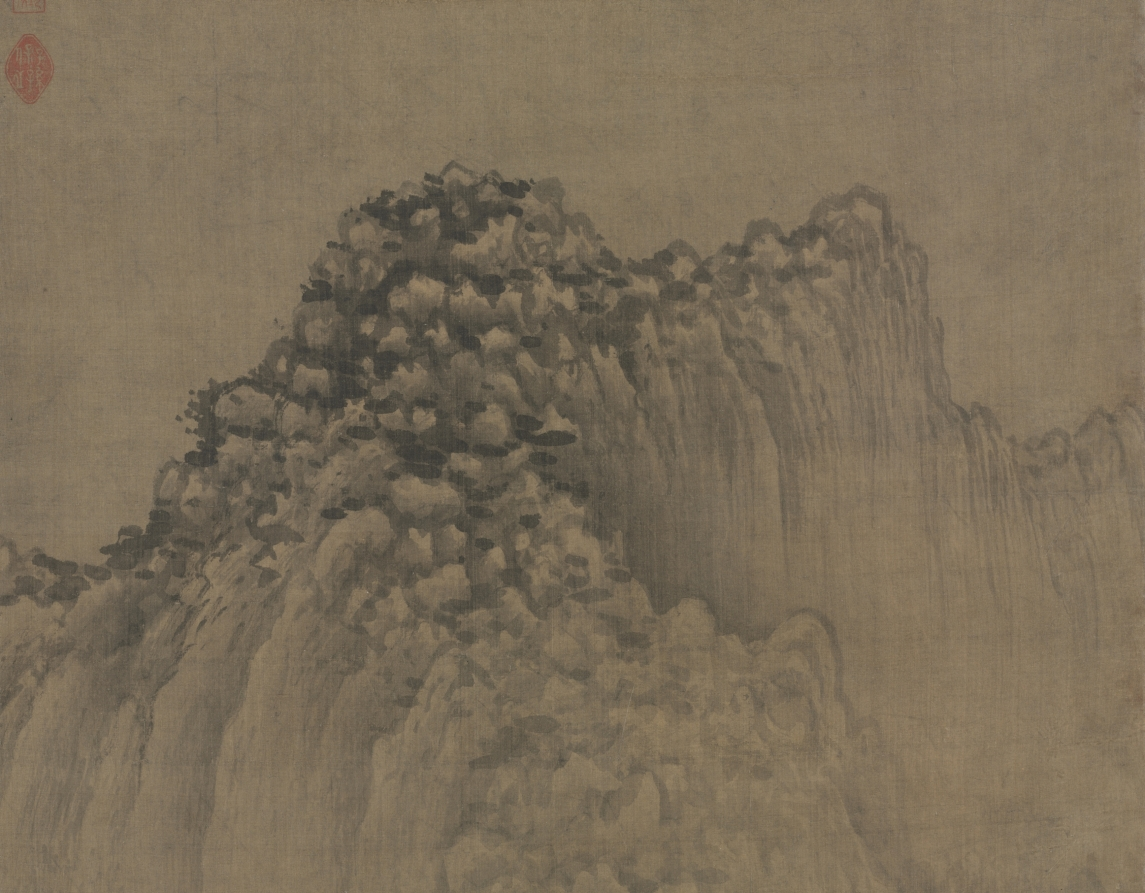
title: Buddhist Retreat by Stream and Mountains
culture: China, Northern Song dynasty (960-1127)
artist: Juran (Chinese, active 960–985)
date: 960–85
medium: Hanging scroll; ink on silk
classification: Painting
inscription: The upper portion of the scroll: the two small characters, “Ju wu 巨五”, written near the large seal. Written by a functionary in Shang Shu Sheng (the Department of State Affairs) when the painting was first received.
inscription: The upper portion of the scroll: the large seal, “Shang Shu Sheng yin 尚書省印” (seal of the Department of State Affairs)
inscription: The upper portion of the scroll: the half-seal “Si yin 司印”, seen along a border. Attributed to 典禮紀察司 of Ming dynasty.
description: Monk Juran served the Southern Tang (937–75) imperial house in Nanjing, where he studied with Dong Yuan (active 930s–60s). Both founded the southern landscape tradition, or Jiangnan school, known for gentle misty riverscapes in wet ink. Juran moved north to Kaifeng when the Southern Tang surrendered to the Northern Song, the impact of which may be seen in this painting, presumably painted after 976. A towering mountain dominates the composition, typically representing the style of the Northern Song academy; while the use of long hemp fiber strokes to texture the mountains, wet dots, and round boulders on mountain tops are elements of the southern landscape tradition.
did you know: This hanging scroll with the towering mountain is a prime example of the monumental landscape style of Northern Song.